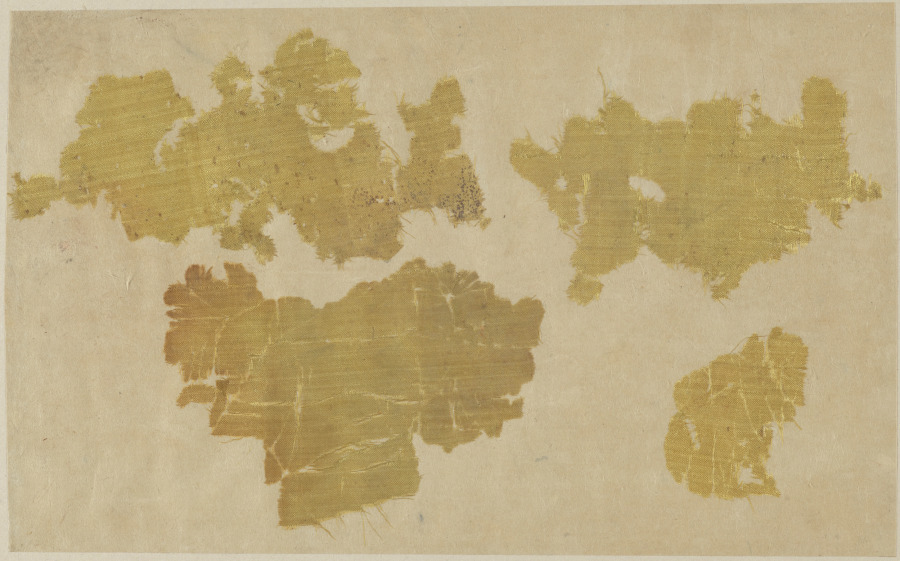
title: Several Fragments Mounted Together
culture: China or Japan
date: 700s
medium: tabby weave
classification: Textile